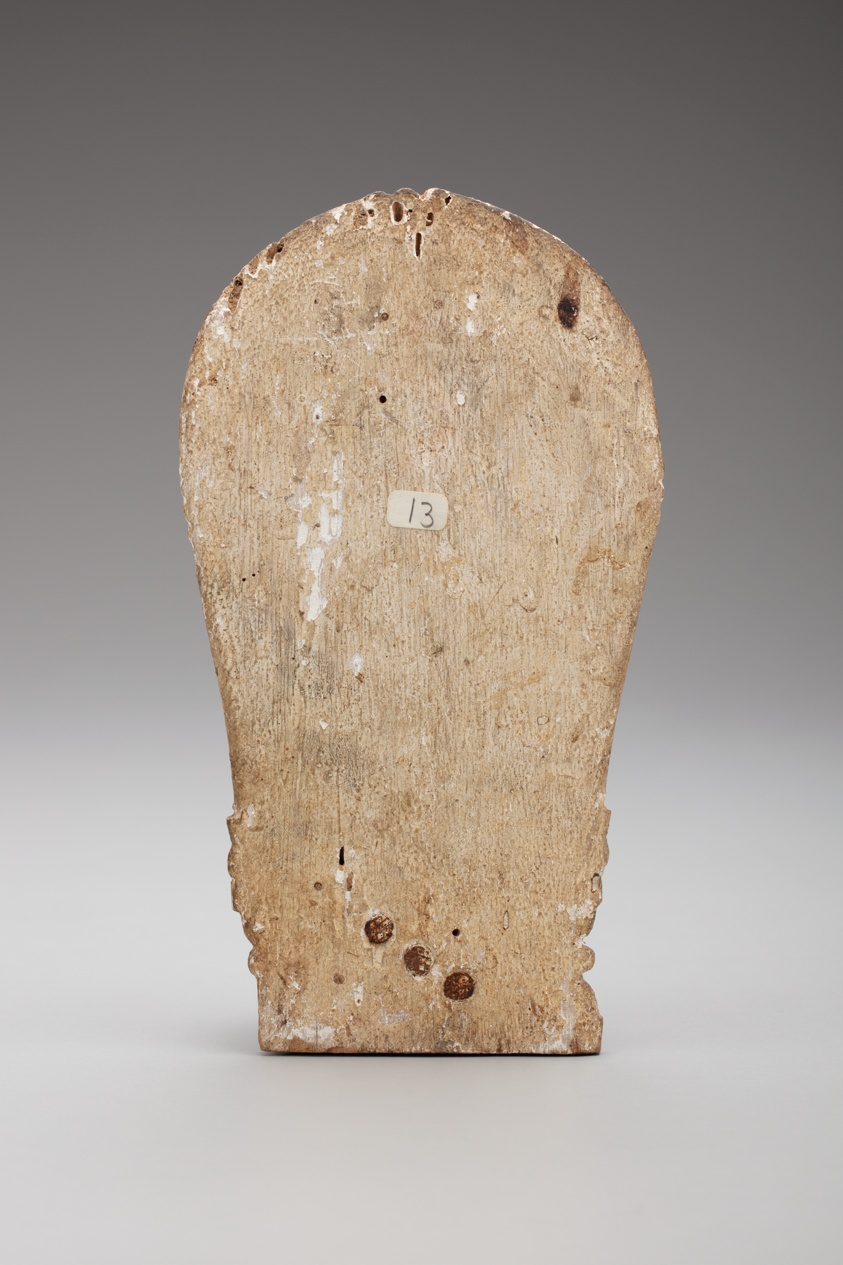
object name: Sculpture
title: Buddha Standing with Hand in the Gesture of Reassurance (Abhayamudra) with Radiating Nimbus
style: South Asian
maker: Sri Lanka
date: Kandyan period (1480–1815)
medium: Ivory, wood, and pigments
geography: Sri Lanka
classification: ivory; sculpture; asian art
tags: Buddha